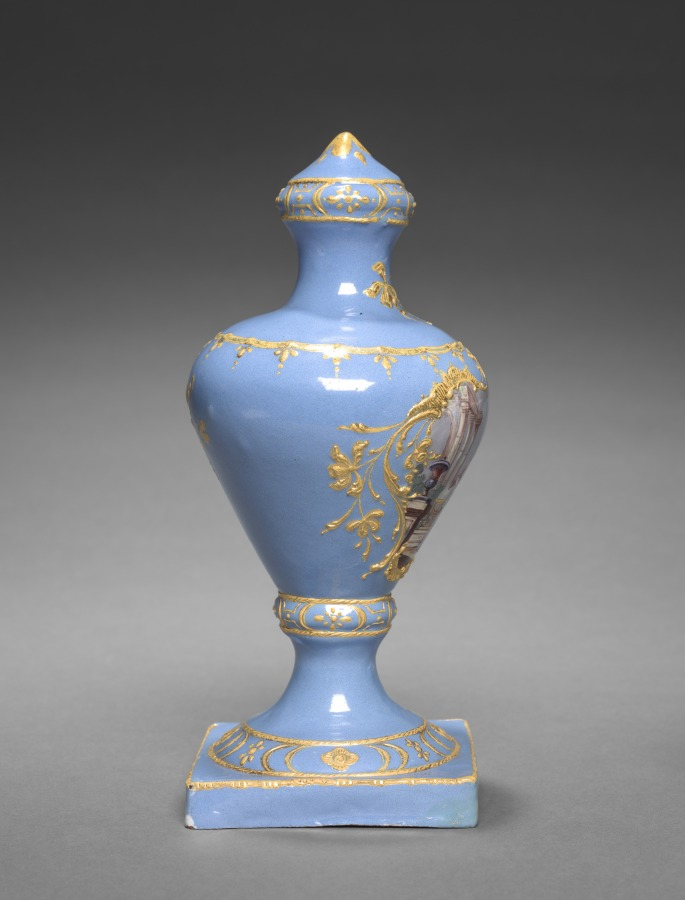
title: Urn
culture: England, South Staffordshire, 18th century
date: c. 1770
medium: enamel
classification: Enamel